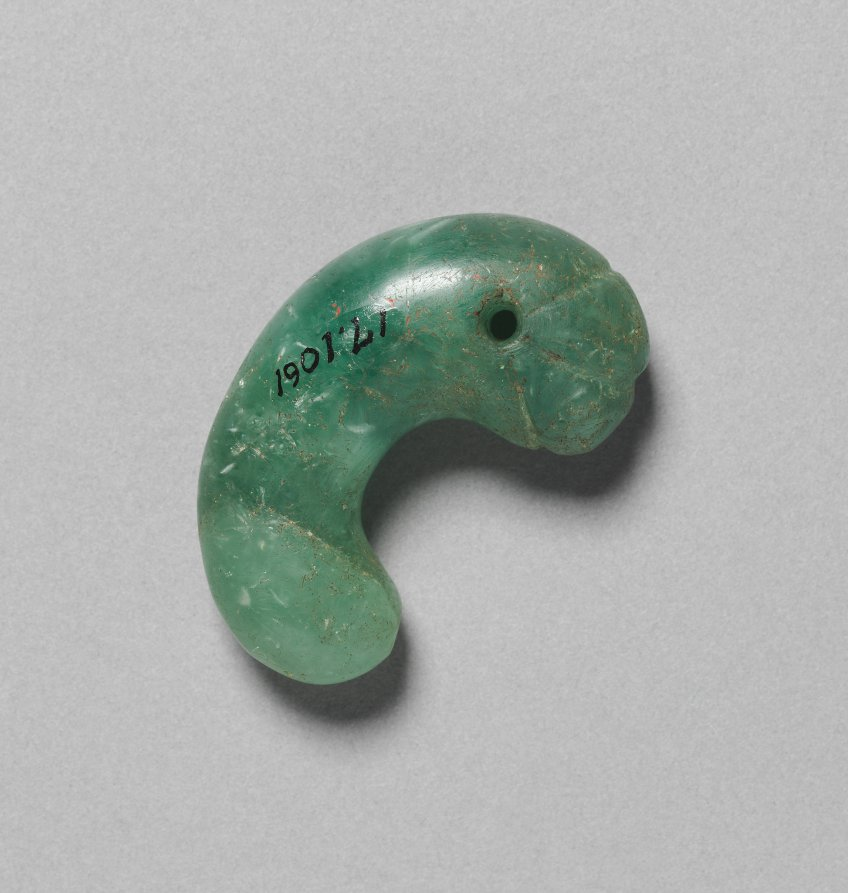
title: Comma-shaped Jade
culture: Korea, Three Kingdoms period (57 BCE–668 CE)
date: 400s CE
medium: glass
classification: Jewelry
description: Jade is one of the hardest stones and requires an intensive, arduous process of abrasion—cutting, chiseling, grinding, and polishing—to achieve the desired shape. A grindstone and a slurry of grit and water shape the jade into the desired form, and then a cloth dampened and rubbed with finer grit may have been used to give the jade the smooth surface. For the Silla kingdom (57 BC–985), in particular, comma-shaped jades served as an essential item for the burials of the ruling class and were luxurious accessories to decorate golden crowns. Their comma shape is thought to represent embryonic forms, symbolizing life, particularly rebirth in the afterlife.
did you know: This unique shaped jade was used as a pendant to decorate necklaces, eyerings, and crowns during the Three Kingdoms period.